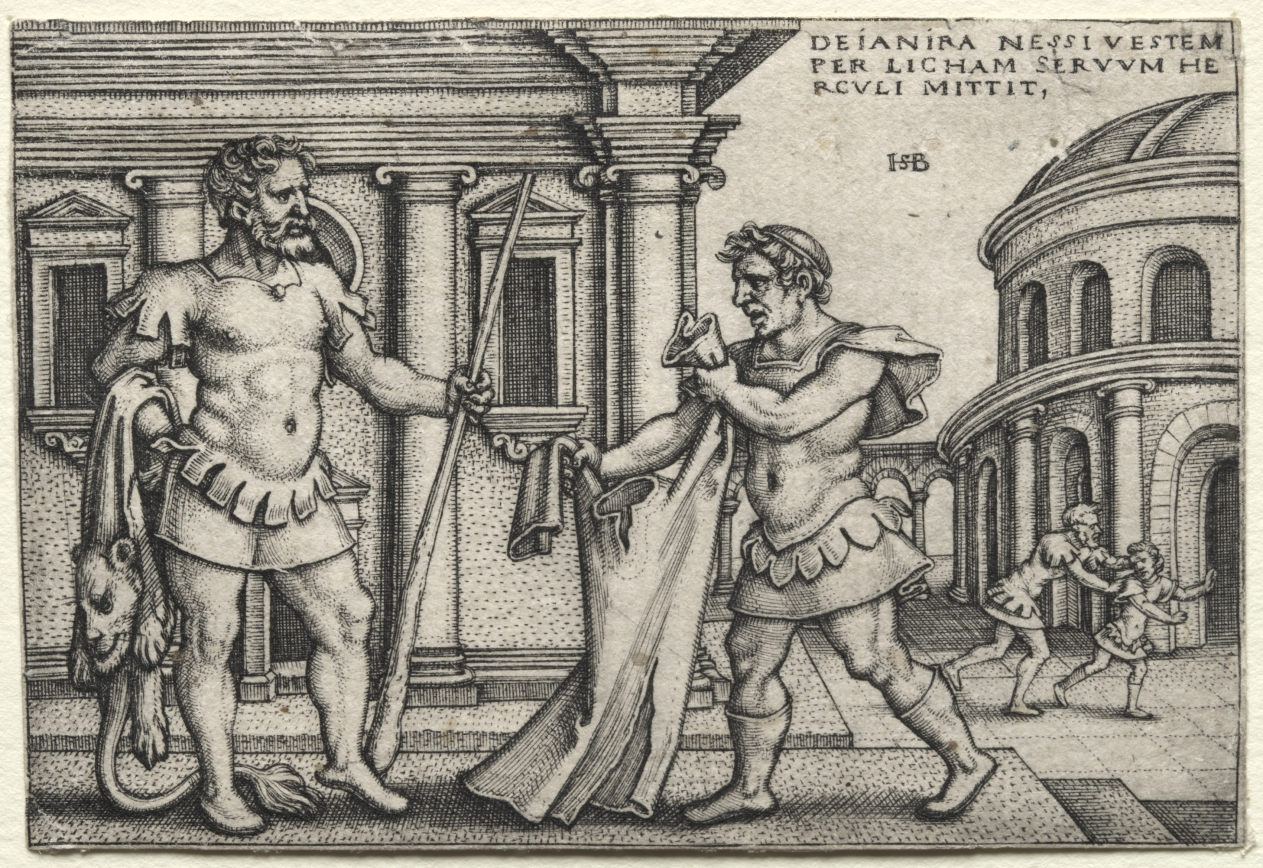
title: The Labors of Hercules: Hercules Receiving the Garment Steeped in Nessus's Blood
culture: Germany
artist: Hans Sebald Beham (German, 1500–1550)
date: 1542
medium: engraving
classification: Print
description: Beham was one of several German printmakers referred to today as the “Little Masters.” They established their artistic prowess by engraving remarkably small prints, appealing to collectors fascinated with miniature objects and curiosities. Here, Beham has packed 12 larger-than-life stories of the mighty Hercules into tiny prints. The series includes three of the 12 labors Hercules performed as penance for slaying his children in a fit of madness: Strangling the Nemean Lion, Killing the Lernean Hydra, and Dragging Cerberus from the Underworld. The other scenes depict tales from his life and the events preceding his death. The son of Jupiter and the mortal Alcmena, Hercules was both man and god. His saga of moral and physical trials made him one of the most popular classical heroes in Renaissance art.